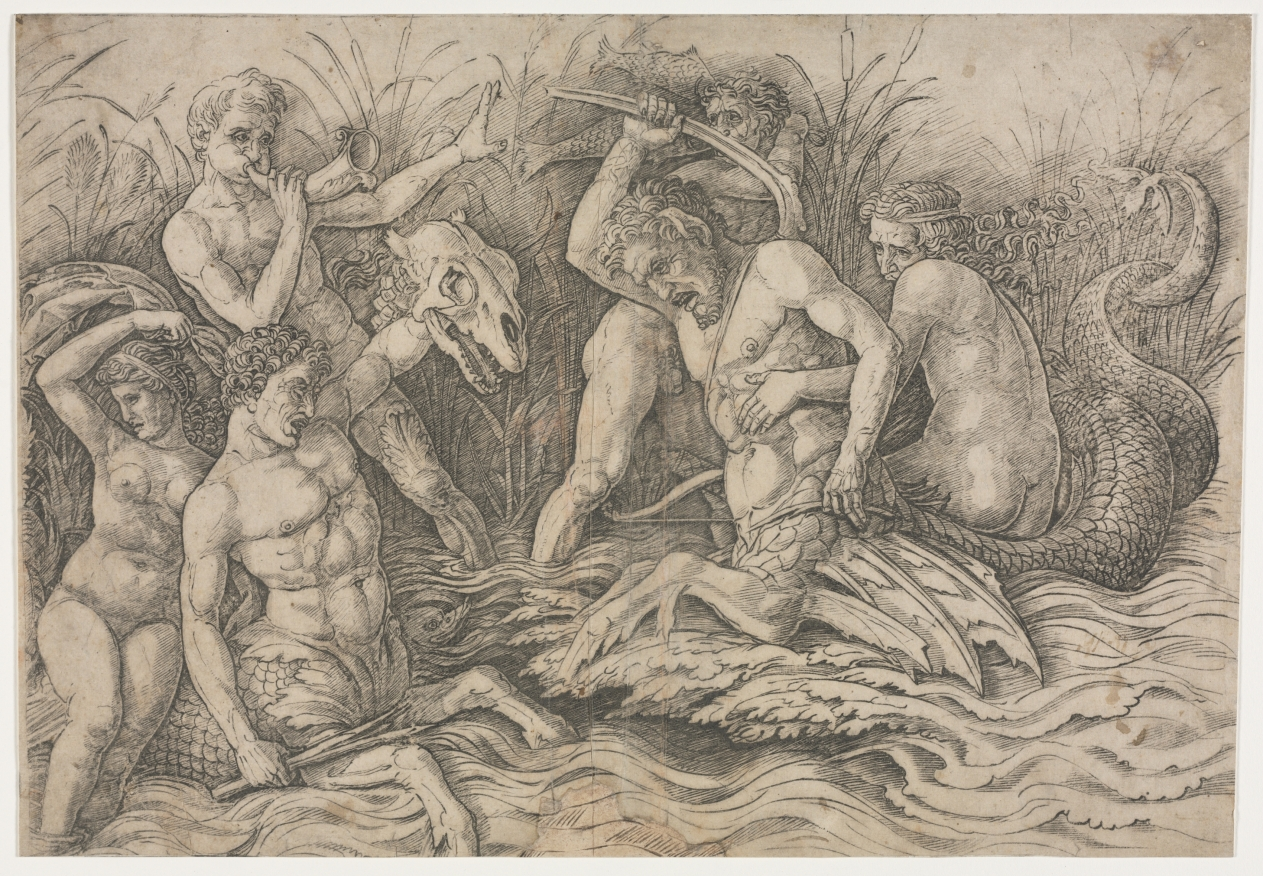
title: Battle of the Sea Gods - right portion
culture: Italy, 15th century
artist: Andrea Mantegna (Italian, about 1431–1506)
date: c. 1485–88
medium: engraving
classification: Print